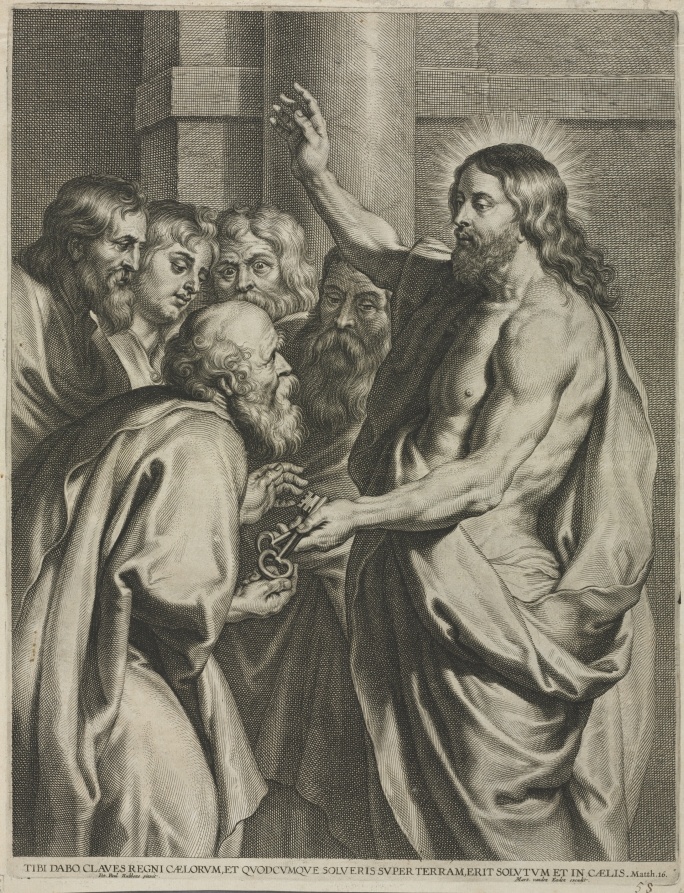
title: Christ Giving the Keys to Peter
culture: Flanders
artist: Pieter I de Jode (Flemish, 1570–1634)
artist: after Peter Paul Rubens (Flemish, 1577–1640)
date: 1600–1634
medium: engraving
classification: Print